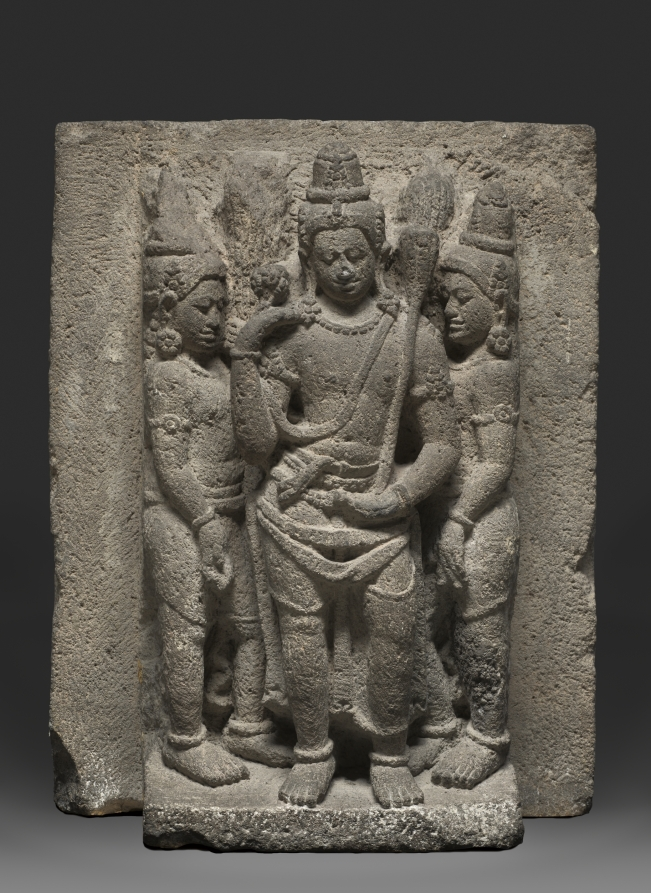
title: Triad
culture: Indonesia, Central Java, Prambanam, Temple of Loro Jonggrang, early 10th Century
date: early 900s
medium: volcanic stone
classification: Sculpture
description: This group has been linked to a temple dedicated to Shiva in Central Java. Its name, Loro Jonggrang, meaning "Slender Maiden," refers to the image of the warrior goddess Durga on the temple, which local legend links to the form of a princess cursed to be turned into stone. The highly porous stone is the distinctive material used to construct temples on the volcanic islands of Indonesia.